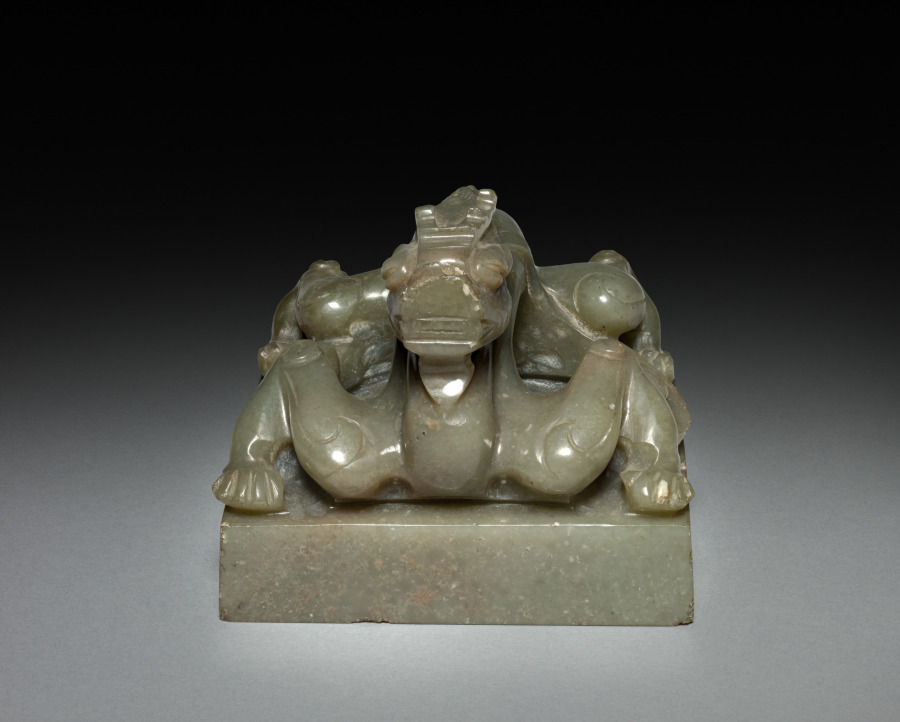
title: Seal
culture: China, Qing dynasty (1644-1911)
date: 1700 or later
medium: Jade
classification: Jade